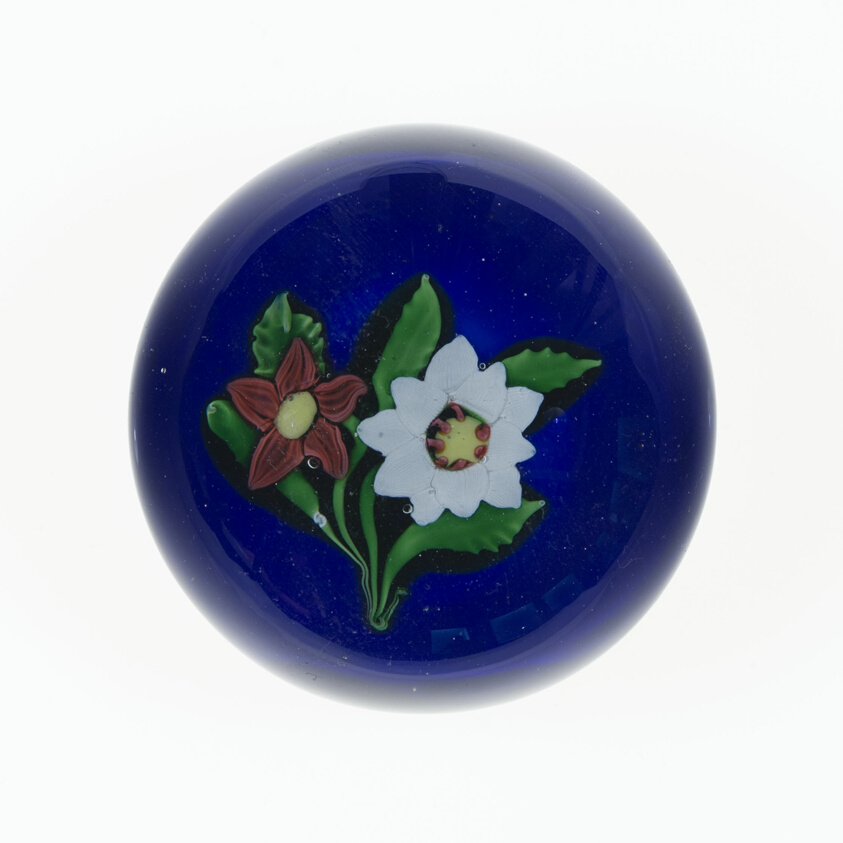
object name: Glass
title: Paperweight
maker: Saint-Louis Glassworks (Cristalleries de Saint-Louis); Lorraine, France, founded 1586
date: c. 1845–60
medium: Glass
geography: Saint-Louis-lès-Bitche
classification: paperweight; glass